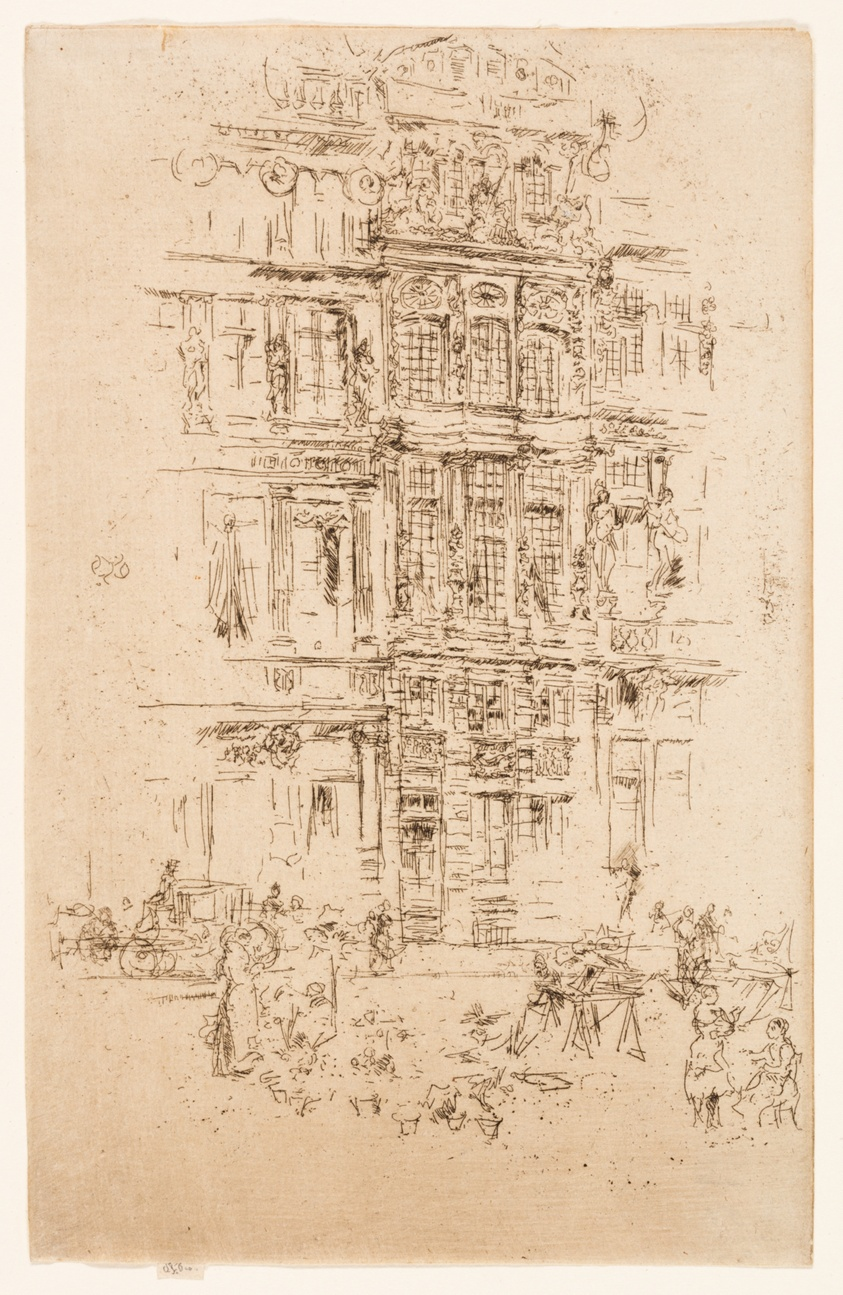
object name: Print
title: Palaces, Brussels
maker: James McNeill Whistler (American, 1834-1903)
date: 1887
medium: Etching and drypoint with foul biting in black ink on cream laid paper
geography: United States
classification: etching; drypoint; print; prints and drawing; foul biting; paper